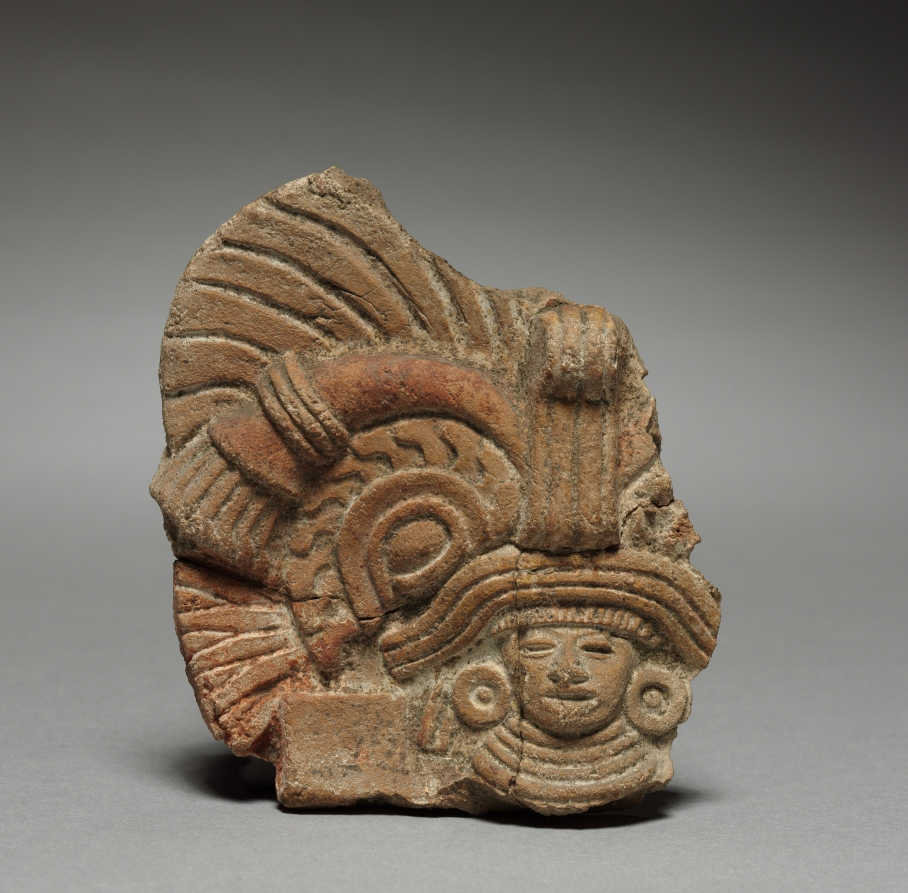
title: Head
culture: Mexico, Teotihuacan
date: 1–750 CE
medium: pottery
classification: Ceramic